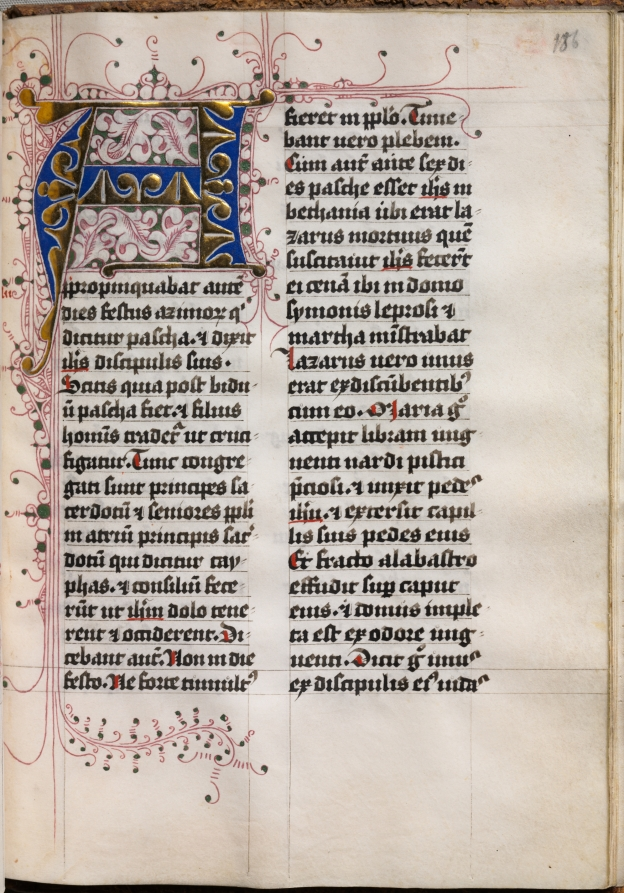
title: Gospel Book with Evangelist Portraits: Decorated Initial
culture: Germany, Middle Rhine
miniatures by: Master of the House-Book (German, c. 1470–1500)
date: c. 1480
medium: ink, tempera, and gold on vellum; original blind stamped leather binding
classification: Bound Volume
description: Each of the four gospels, here in Latin, are preceded by a full-page miniature of the appropriate Evangelist. As is conventional, the Evangelists are represented as contemporary scribes seated at a lectern surrounded by all the accouterments of the trade—inkpots, quill pens, penknives, etc. The miniatures' style is characteristically German late Gothic in its expressive use of angular drapery and realistic detail. Each miniature, however, bears the marks of The Hausbuch Master's hand: notice the terrace space for each figure and the emphasis on realistically rendered details, such as the furniture construction and the tools of the scribe as well as the facial types, with their heavy-lidded, downcast eyes. This artist was occasionally noted for his humor, as here in the portrait of the Evangelist John in which he depicted the saint erasing an error in his text with a pen knife in his left hand and a quill pen in his right. The skillful penwork, tracery, vine scrolls, and the large initials are the work of the other artists. The binding is original. The Hausbuch Master is known primarily for an album of lively drawings as well as some 90 copper engravings.